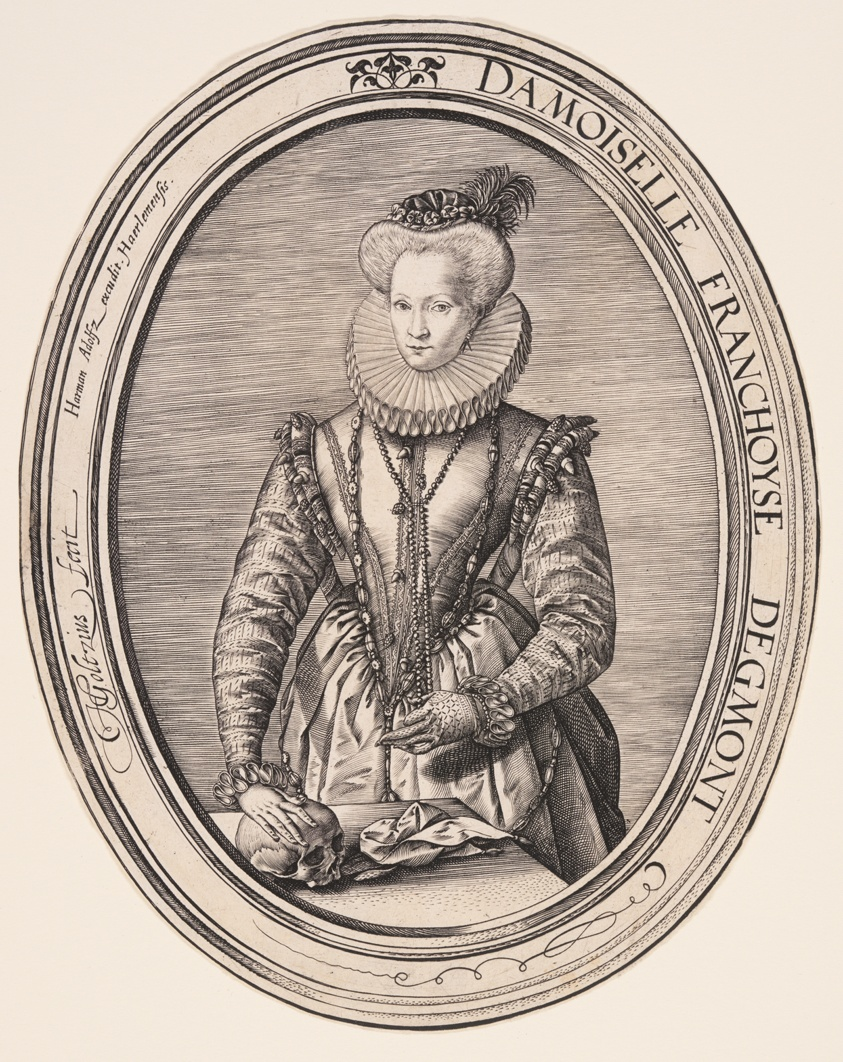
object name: Print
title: Françoise van Egmond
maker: Hendrick Goltzius (Dutch, 1558–1617)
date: 1580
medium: Engraving on laid paper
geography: Netherlands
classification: engraving; paper; print; prints and drawing